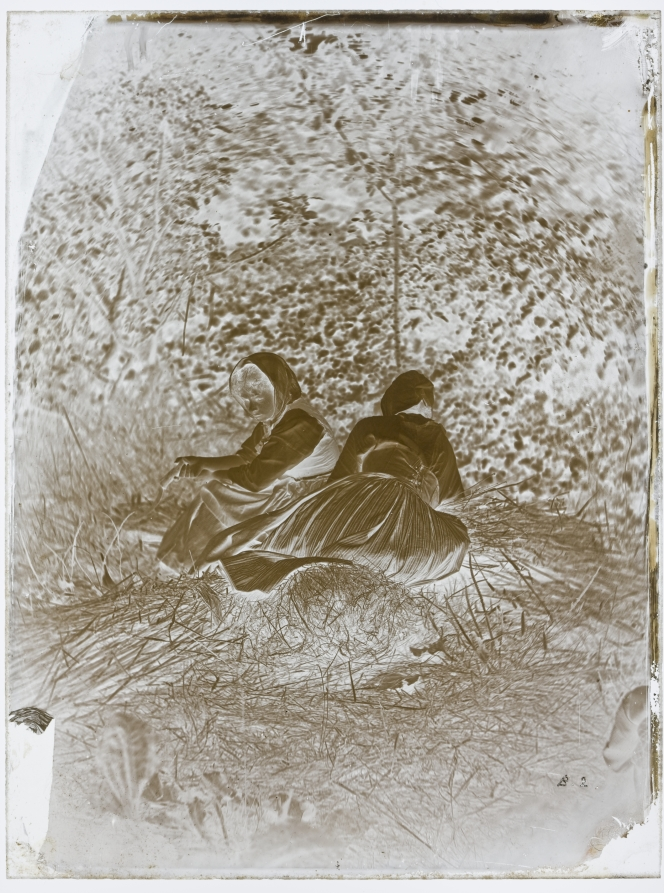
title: Two Peasant Girls Seated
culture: France, 19th century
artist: Auguste Giraudon's Artist (French)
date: 1870s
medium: glass negative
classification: Photograph